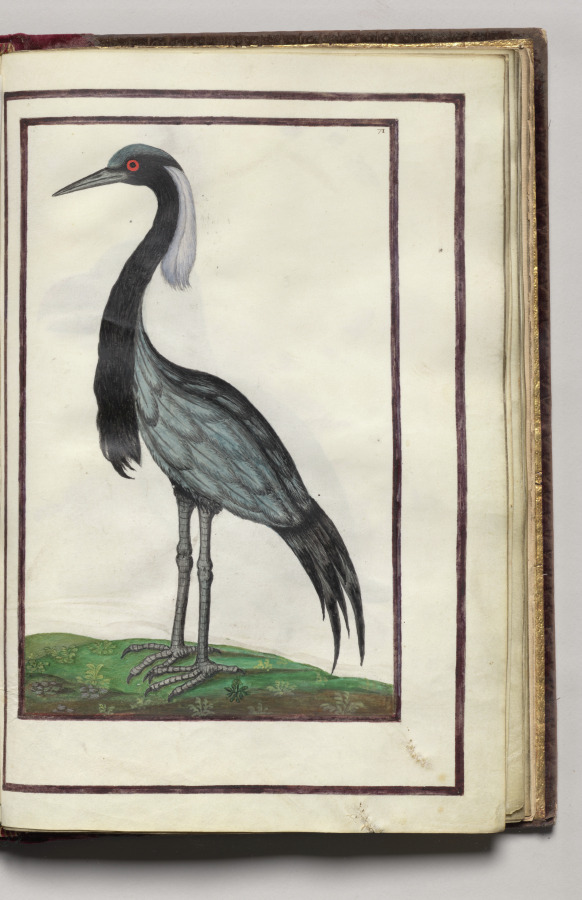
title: Heron, folio 36 (recto), from Florilegium (A Book of Flower Studies)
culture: France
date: 1608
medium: watercolor, ink, silver, and gold over occasional traces of pencil, on vellum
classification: Bound Volume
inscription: Dated: Poitiers 1608 (on frontispiece) Signed: On frontispiece in black ink, lower right: Van Kuyk Notation on drawing: Frontispiece: in pencil, lower margin: * élève de Van Kessel, peintre flammand (* in pencil also appears in front of Van Kuyk's name).